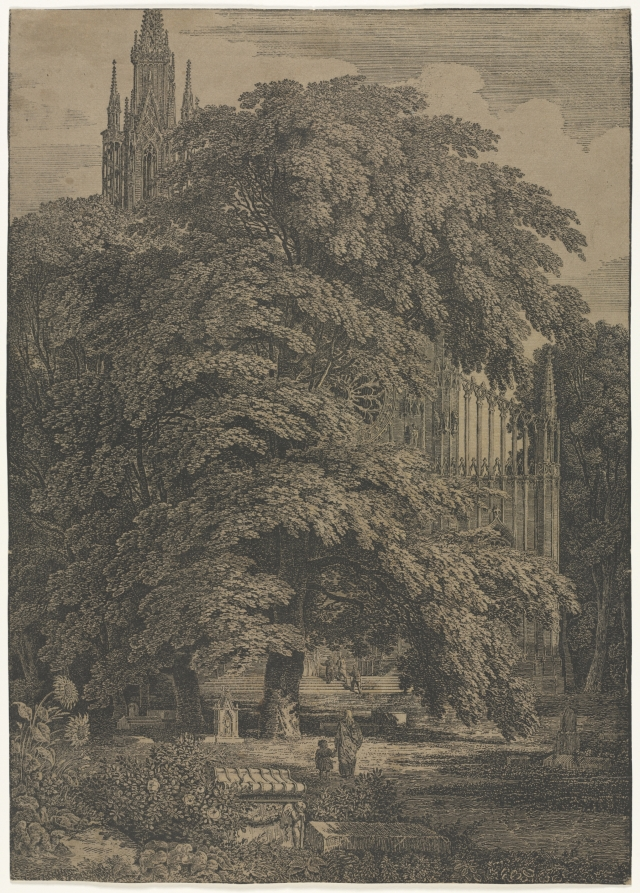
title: Gothic Church among Oaks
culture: Germany, 19th century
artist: Karl Friedrich Schinkel (German, 1781–1841)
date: 1810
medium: lithograph with tint stone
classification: Print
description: Schinkel was the principle German architect of the first half of the 19th century. Responsible for almost every public building in Berlin, his neoclassical buildings for the city, based on the rational order and classic proportions of antiquity, came to define the power and stability of the Prussian capital. Schinkel also had a career as a painter and printmaker in which he developed his ideas of architectural splendor in landscapes that juxtaposed nature with buildings. The theme of the visionary Gothic cathedral pervades his work. Gothic Church among Oaks combines the principal Romantic tenets of Christianity, nature, patriotism, and medievalism into one image. Here, as in Quaglio’s Outer Staircase of a Gothic Ruin, a small child is contrasted with the enormity of the oak and the Gothic ruin. The continuity of life in the midst of death is signified by the sunflower among gravestones.